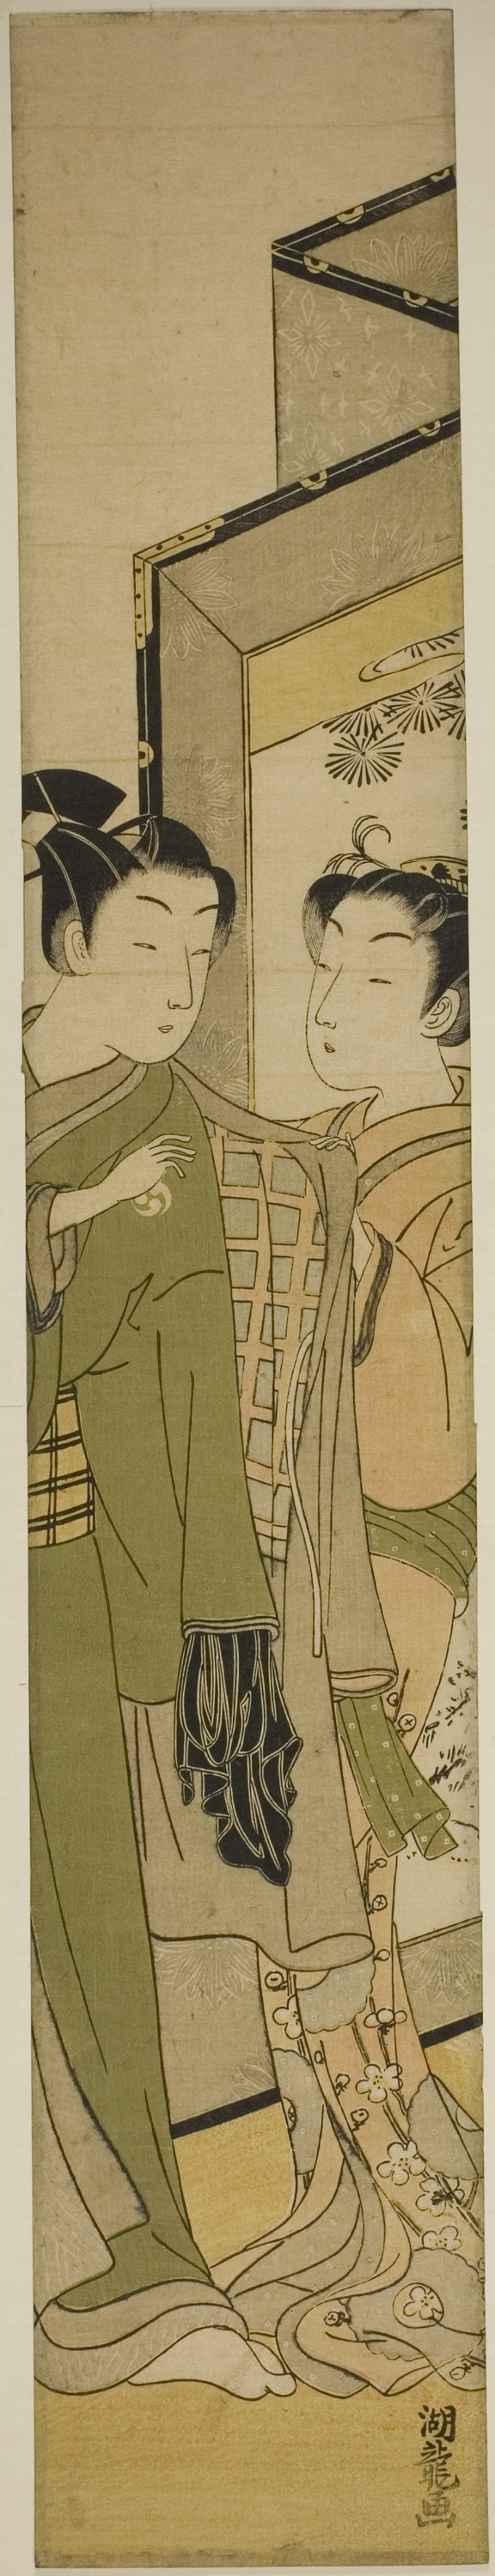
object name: Print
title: Taking Leave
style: Japanese (culture or style)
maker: Isoda Koryusai (Japanese, 1735-1790)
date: c. 1770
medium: Color woodblock print; hashira-e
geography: Japan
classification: woodblock print; print; asian art